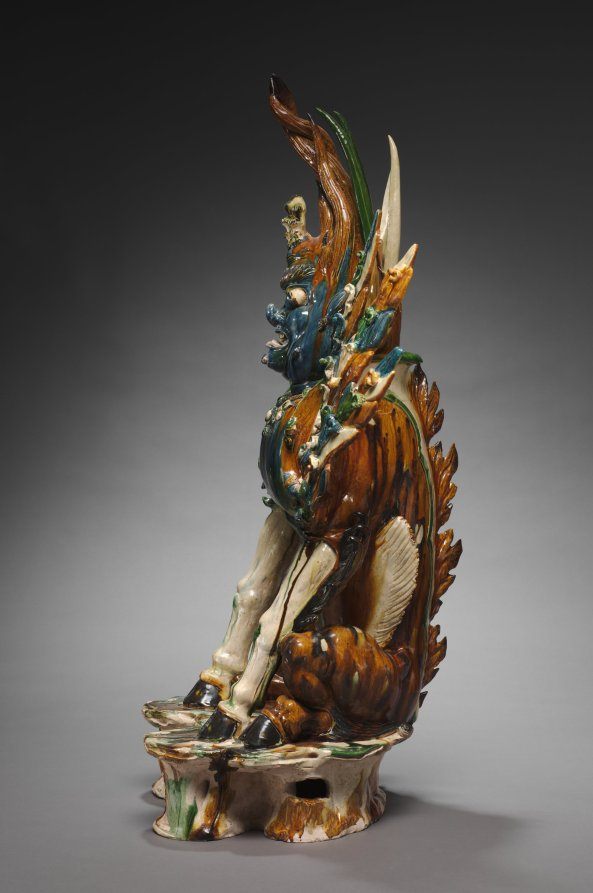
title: Tomb Guardian with Human Face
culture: China, probably Shaanxi province, Xi'an, Tang dynasty (618-907)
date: early 700s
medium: glazed earthenware, sancai (three-color) ware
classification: Ceramic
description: With their fierce expressions and exaggerated physical features, these two fantastic guardian creatures were intended to guard the entrance to a tomb, warding off evil as well as keeping the soul of the deceased from wandering. Known as "earth spirits" or qitou, this one sports a human face with huge protruding ears and a short horn surrounded by fiery, twisting hair; the other has an animal face and a pair of antlers growing above its eyebrows. Their many elongated spikes heighten the fearful intensity. Before tomb sculptures were placed in the tomb, they were carried through the streets in a funerary procession. Funerary gifts provided the deceased with means for the afterlife. They were also an expression of filial piety and demonstrated the wealth and power of the descendants.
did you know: Cobalt blue glaze used on the head and chest was imported from the Middle East.